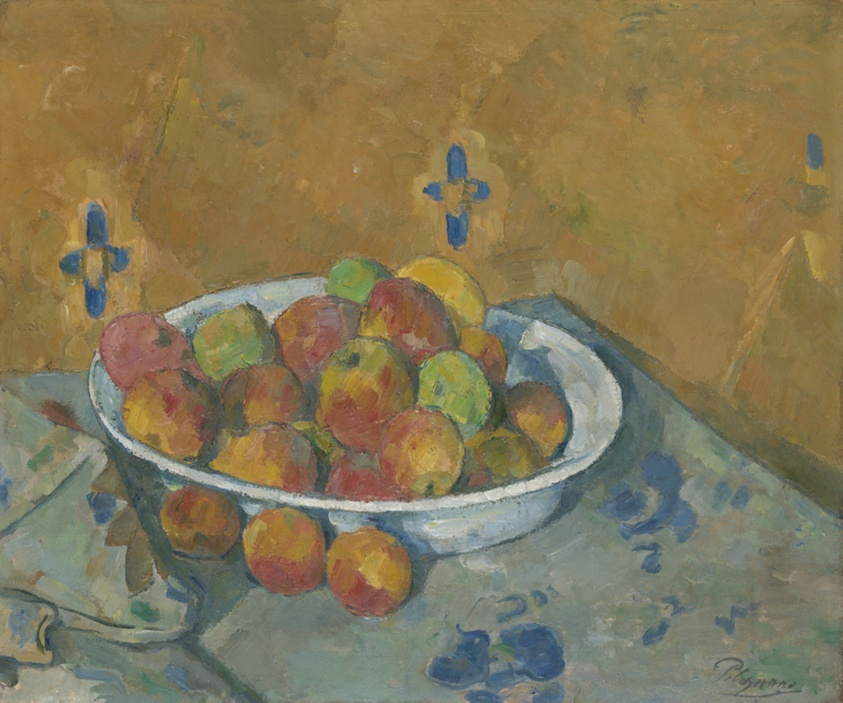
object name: Painting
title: The Plate of Apples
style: Post-Impressionism, 19th century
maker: Paul Cezanne (French, 1839–1906)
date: c. 1877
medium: Oil on canvas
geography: France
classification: oil on canvas; french; oil paintings (visual works); paint; painting; european painting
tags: still life, table, fruit, apples, bowl, food